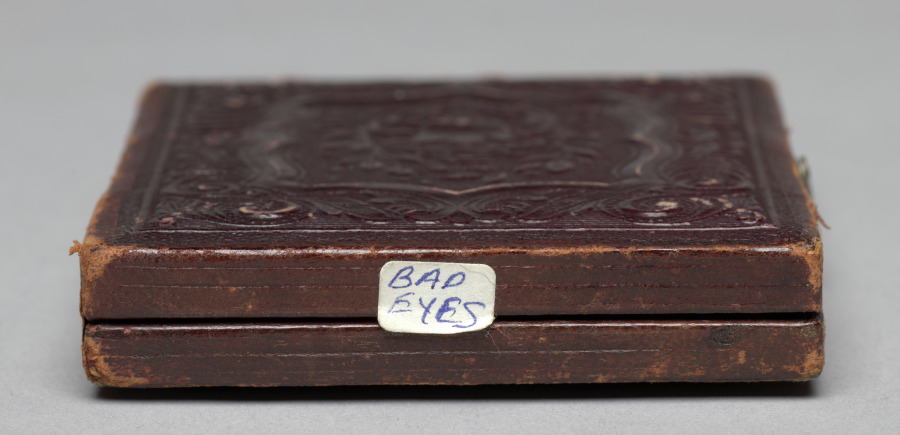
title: Mother with son with blind right eye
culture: America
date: c. 1855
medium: daguerreotype, sixth plate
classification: Photograph